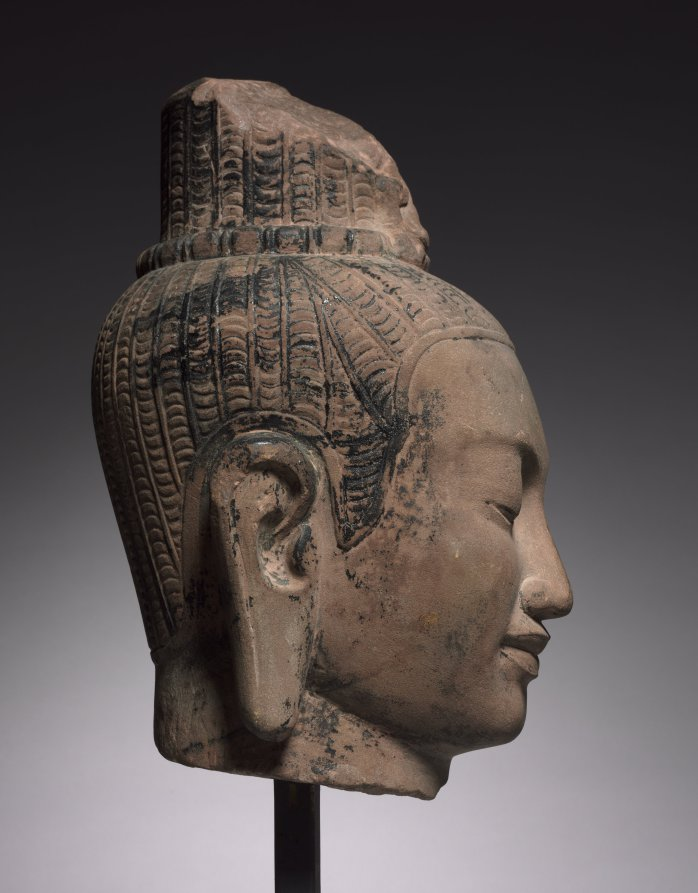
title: Head of Lokeshvara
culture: Cambodia, reign of Jayavarman 7th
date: late 1100s–early 1200s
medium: Sandstone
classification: Sculpture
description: At Banteay Chhmar, none of the three-dimensional stone sculptures that were installed in the temple buildings remain standing. Only fragments of five stone sculptures of Lokeshvara have been found, and more may be recovered with future clearing of the site. This head is stylistically similar to the ones from Banteay Chhmar and is of the type made throughout Cambodia during the reign of Jayavarman VII. Lokeshvara was the form under which his father was apotheosized and venerated. Traces of black lacquer on the stone’s surface remain from when the head was probably refashioned into another image, likely reused for other Buddhist groups who became influential in the post-Angkorian period whose main focus was the historical Buddha rather than Lokeshvara. The lacquer, however, preserved the stone carving beneath, and it shows how the face of the bas-relief of the ten-armed Lokeshvara from Banteay Chhmar would have looked, had it not become eroded by exposure to the elements. The downcast eyes have a compassionate and meditative gaze, while the mouth smiles gently in the confidence of the power of his mercy. The small figure of a seated Buddha in front of the topknot of hair confirms his identity as Lokeshvara.